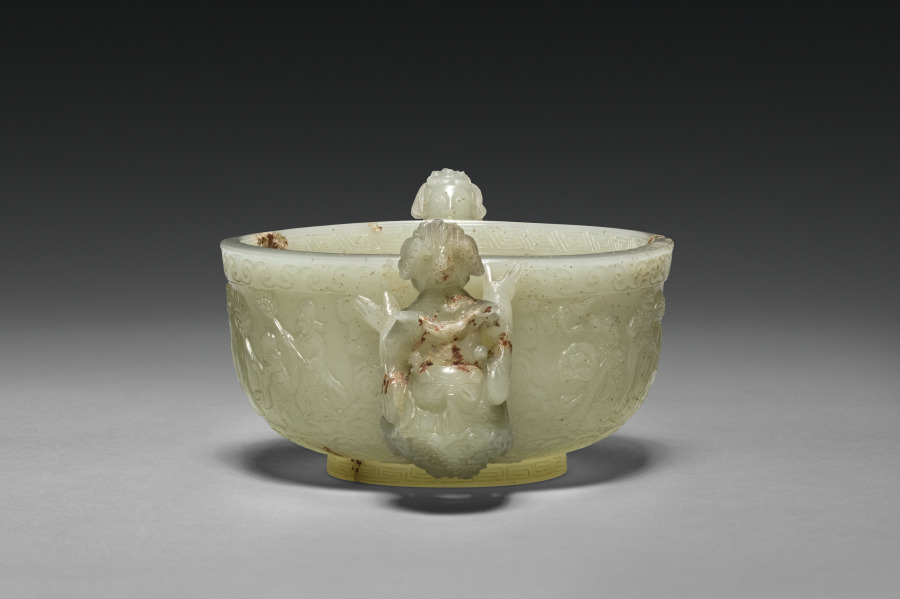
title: Cup with Daoist Figures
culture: China, Qing dynasty (1644–1911), Qianlong period (1736–95)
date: 1736–95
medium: Pale greenish-white jade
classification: Jade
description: During the Qing dynasty, Suzhou’s best products were sent north to the capital. Those that met imperial approval were sometimes graced with Qianlong’s mark, added by calligraphers and jade workers at court. The lack of a Qianlong mark on the Cleveland cup suggests that it might not have reached the court. Previously dated to the Yuan dynasty (1271–1368), new scholarship dates this cup to the Qing period.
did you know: Two female immortals serve as handles, while a Daoist procession with immortals, musicians, and attendants winds around the body of the cup.